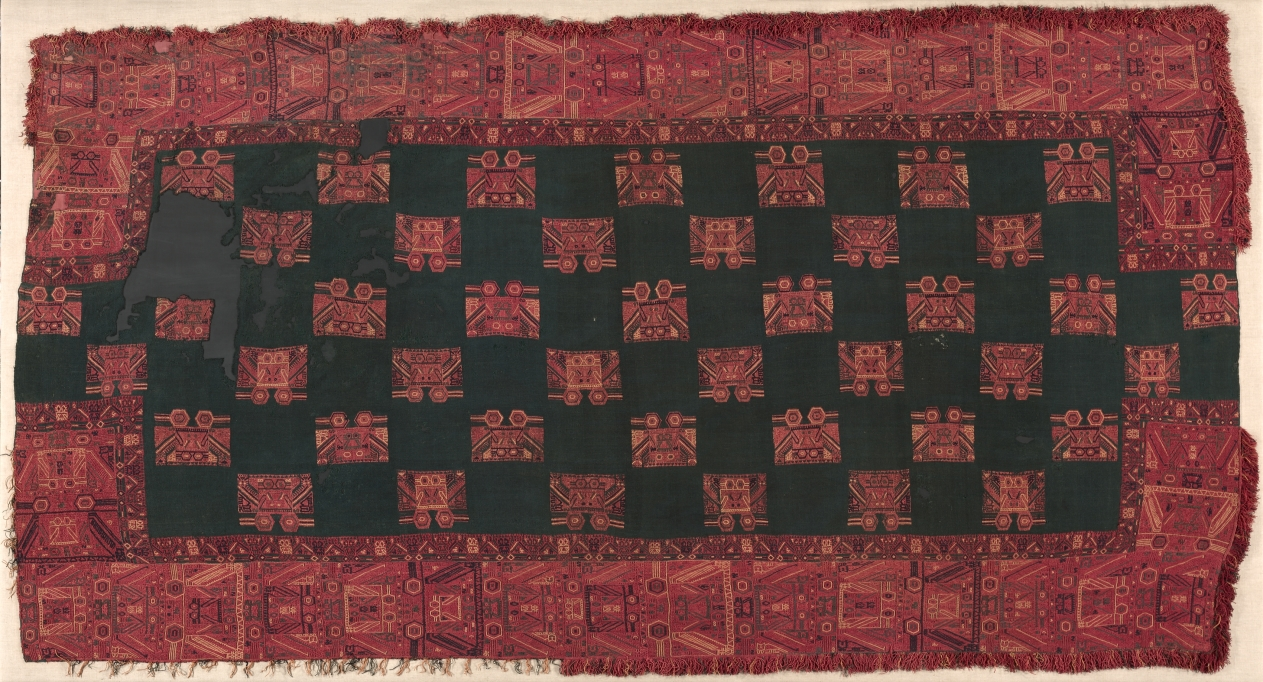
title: Mantle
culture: Peru, South Coast, Paracas (Cavernas) style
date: c. 300 BCE–200 CE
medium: camelid fiber: plain weave with embroidery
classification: Textile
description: Buried in shaft-tombs, or rectangular sunken chambers, the Paracas dead were wrapped in layers of cloth and accompanied by pottery, food, and other offerings. The dry environment of the Paracas Peninsula helped preserve many of these textiles, including richly ornamented garments buried with important individuals. This mantle, probably worn like a cloak, relates closely to the tunic (CMA 1946.227) and long headband (CMA 1946.228) due to their shared imagery. Its double-headed bird motifs— embroidered in vivid red, blue, yellow, and green yarns—likely had symbolic significance, although the specific meaning remains unknown.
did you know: The profusion and decoration of textiles in Paracas burials shows the value placed on cloth.